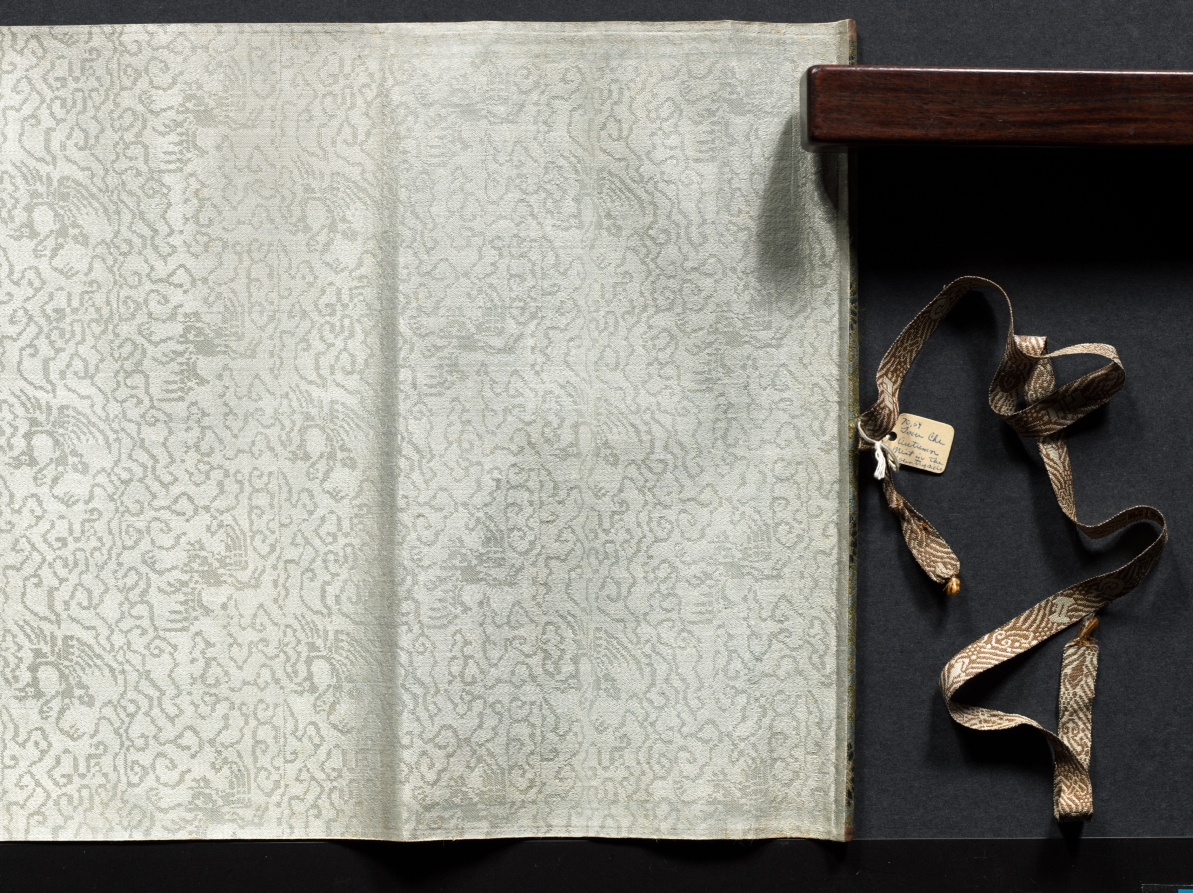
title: Autumn Mist in the Countryside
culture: China, Qing dynasty (1644-1911)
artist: Zou Zhe (Chinese, c. 1610-before 1688)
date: 1647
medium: handscroll, ink and color on paper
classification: Painting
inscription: Artist's inscription, signature, and seal: The first day of the sixth lunar month, the ting-hai year [1647], Tsou Che painted [this]. [seal] Fang-lu.